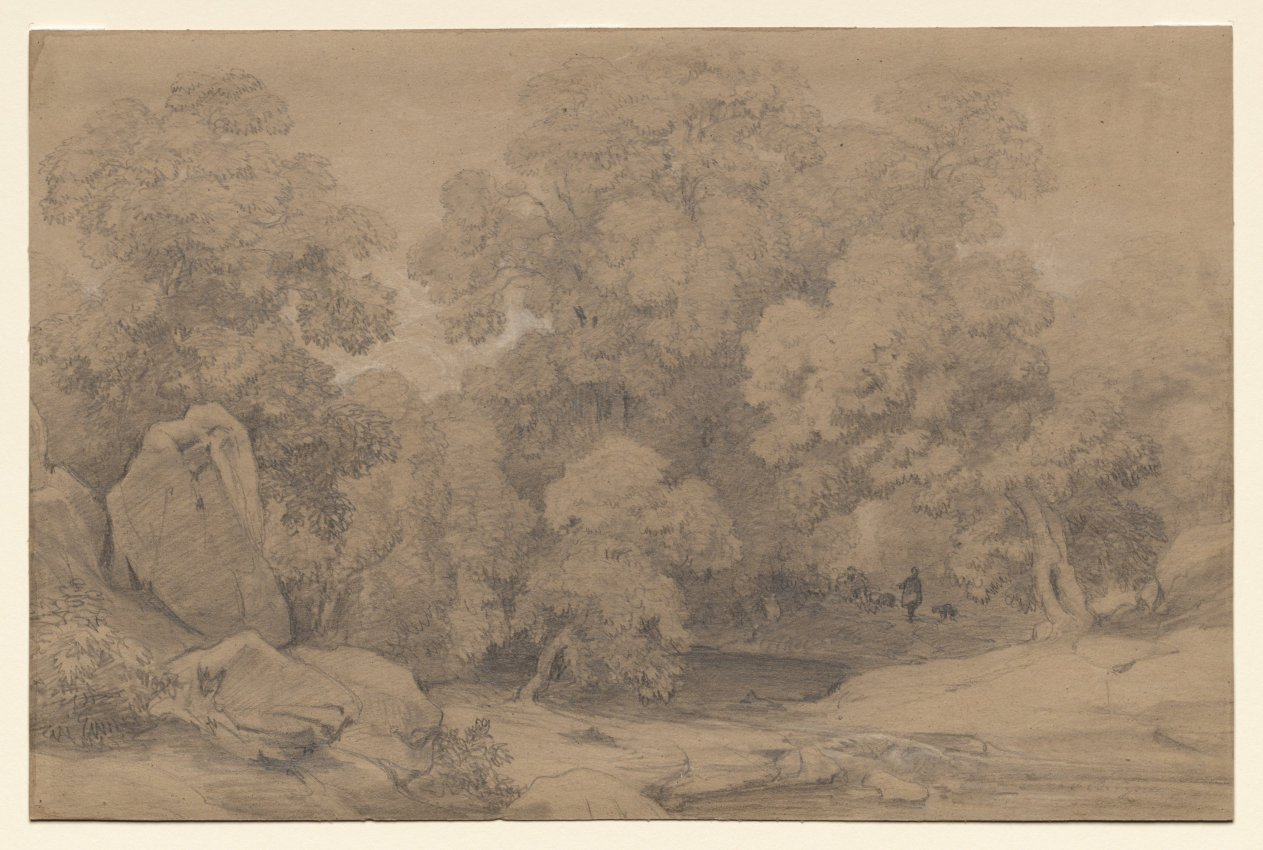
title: Landscape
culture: England, 18th century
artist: James Baker Pyne (British, 1800–1870)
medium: graphite and white chalk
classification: Drawing